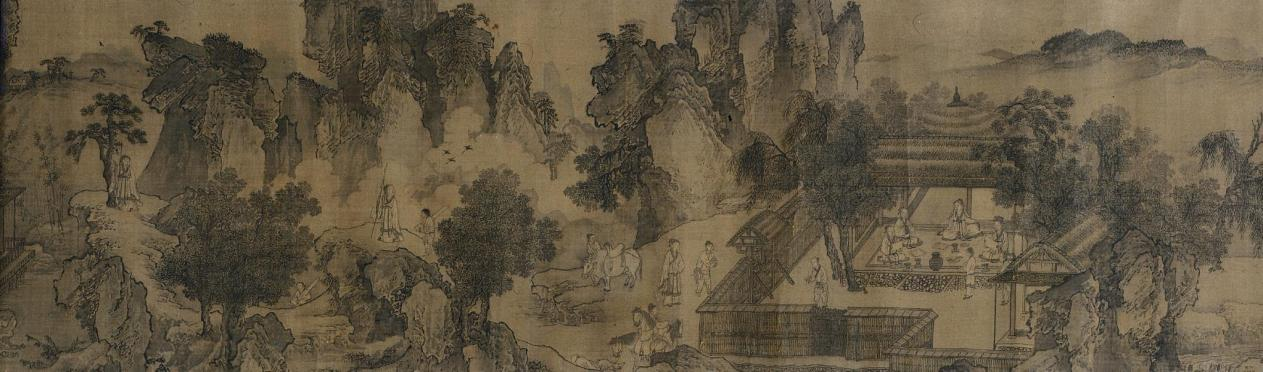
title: Tao Yuanming's Return Home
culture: China, Yuan dynasty (1271-1368)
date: 1300s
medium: Handscroll; ink and slight color on silk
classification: Painting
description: Tao Yuanming's revered poem "Return Home 歸去來辭 (Gui qu lai ci)" powerfully conveys his desire to leave bureaucratic life for the simplicity and authenticity of nature. This sentiment has deeply resonated with generations of Chinese scholars, making it a popular theme in paintings. This handscroll uses continuous narrative depicting Tao in multiple scenes from the poem. Starting on the right, the poet travels to his home. His children wait by the gate, while his wife pauses to tidy her hair before welcoming him. Then, free from the burdens of official service, Tao spends time in both nature and his cottage, where he can again enjoy wine, music, and books.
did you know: Poet Tao Yuanming 陶淵明 (c. 365–427 CE) returned to a secluded life instead of pursuing a civil service career.